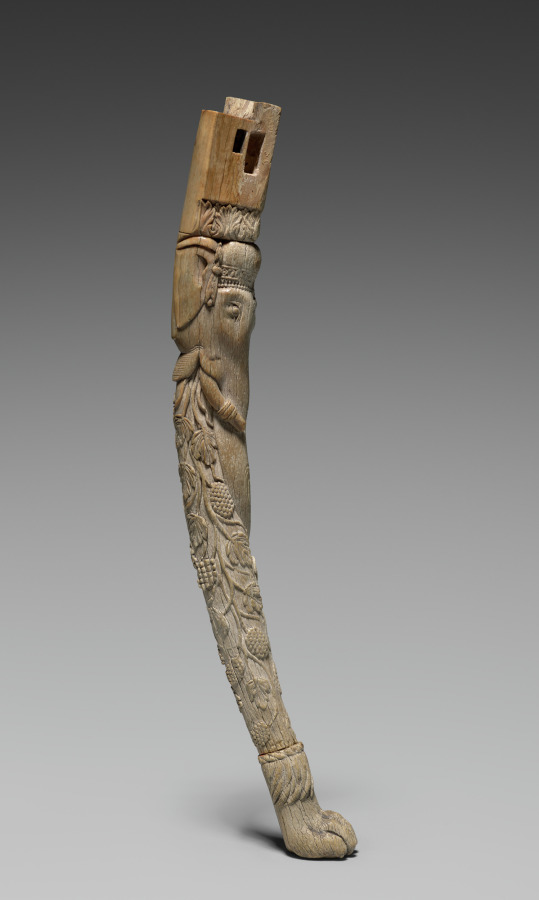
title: Chair Leg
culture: Afghanistan, Begram, Kushan period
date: 300s CE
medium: ivory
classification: Ivory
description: This ivory carving was made to sheath wooden furniture made in India for trade along the Silk Road, which stretched from Rome to China. Indian ivory-faced furnishings--along with lacquer boxes from China and painted glass from Rome--were found in an extraordinary deposit of luxury goods at a site called Begram. The wood on which the ivory and lacquer were affixed has long disintegrated, and only the small pieces remain.